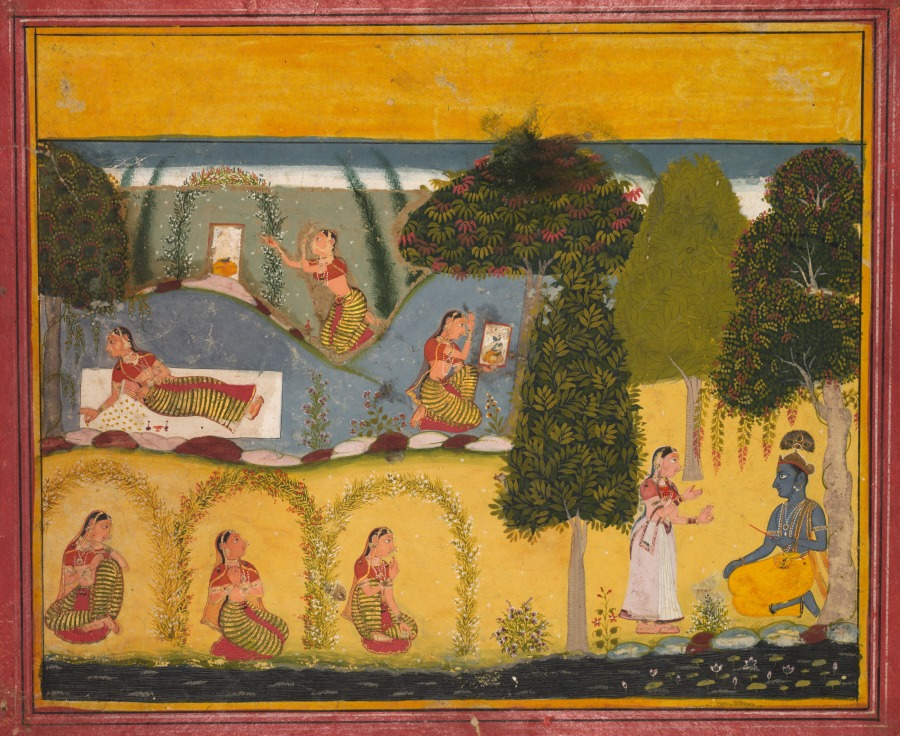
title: Radha Awaiting Reconciliation with Krishna, from a Gita Govinda of Jayadeva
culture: Northwestern India, Rajasthan, Rajput Kingdom of Mewar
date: c. 1680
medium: Gum tempera and gold on paper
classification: Painting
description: The artist has depicted Krishna’s favorite lover, Radha, six times to emphasize her agitation while she waits for Krishna. She has made intimate enclosures of flowering branches for their tryst, she pleads with a picture of him, and she lays out blossoms and liquor under a tree in preparation. Her confidante makes an appeal to Krishna who sits under a tree at right, seemingly unmoved and dispassionate. The viewer is meant to put oneself in the place of Radha, and feel her intense longing for Krishna. Even when it seems like the god does not come when he promises, that he does not care, the devotee, like Radha, should continue to wait and prepare to receive him.